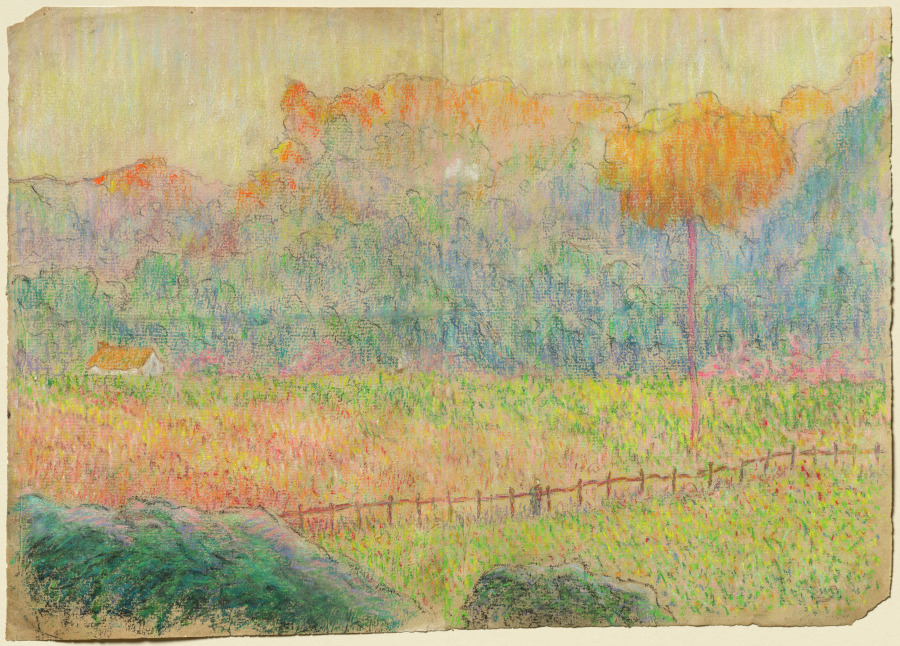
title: Study for "Landscape with Figure and Houses"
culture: France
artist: Claude-Emile Schuffenecker (French, 1851–1934)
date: c. 1891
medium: pastel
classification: Drawing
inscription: stamped, at lower right, in gray ink: artist's mark (not in Lugt); inscribed, on verso, at upper left, in brown ink: Nocturne Espagnol / flute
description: This drawing is a study for Claude-Emile Schuffenecker's highly finished pastel with the same title, also in the collection of the Cleveland Museum of Art (2014.2). All of the major compositional elements of the scene—the lichen-covered rocks in the foreground, the figure by the fence that stretches horizontally across the landscape, and the cottage in the distance—are suggested in this preparatory work. Flecks of color in the field and streaks in the background foliage and sky create a shimmering effect that is further enhanced in the finished pastel.